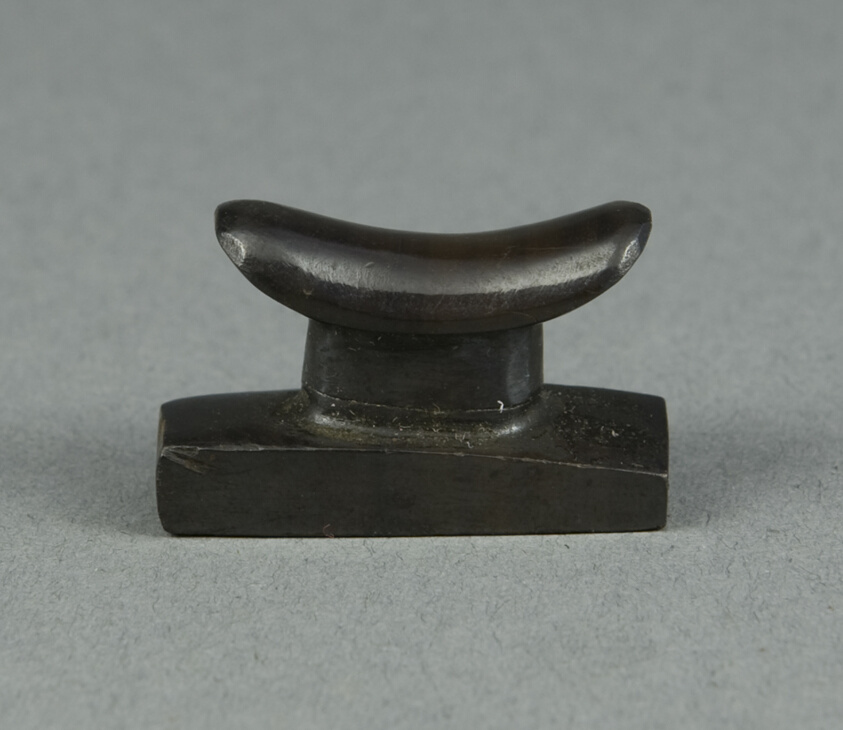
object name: Costume and Accessories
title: Amulet of a Headrest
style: late period (egyptian), egyptian, ancient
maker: Egyptian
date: Late Period, Dynasties 26–31 (664–332 BCE)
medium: Hematite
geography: Egypt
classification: amulet; jewelry; stone; ancient art; costume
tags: Headrest